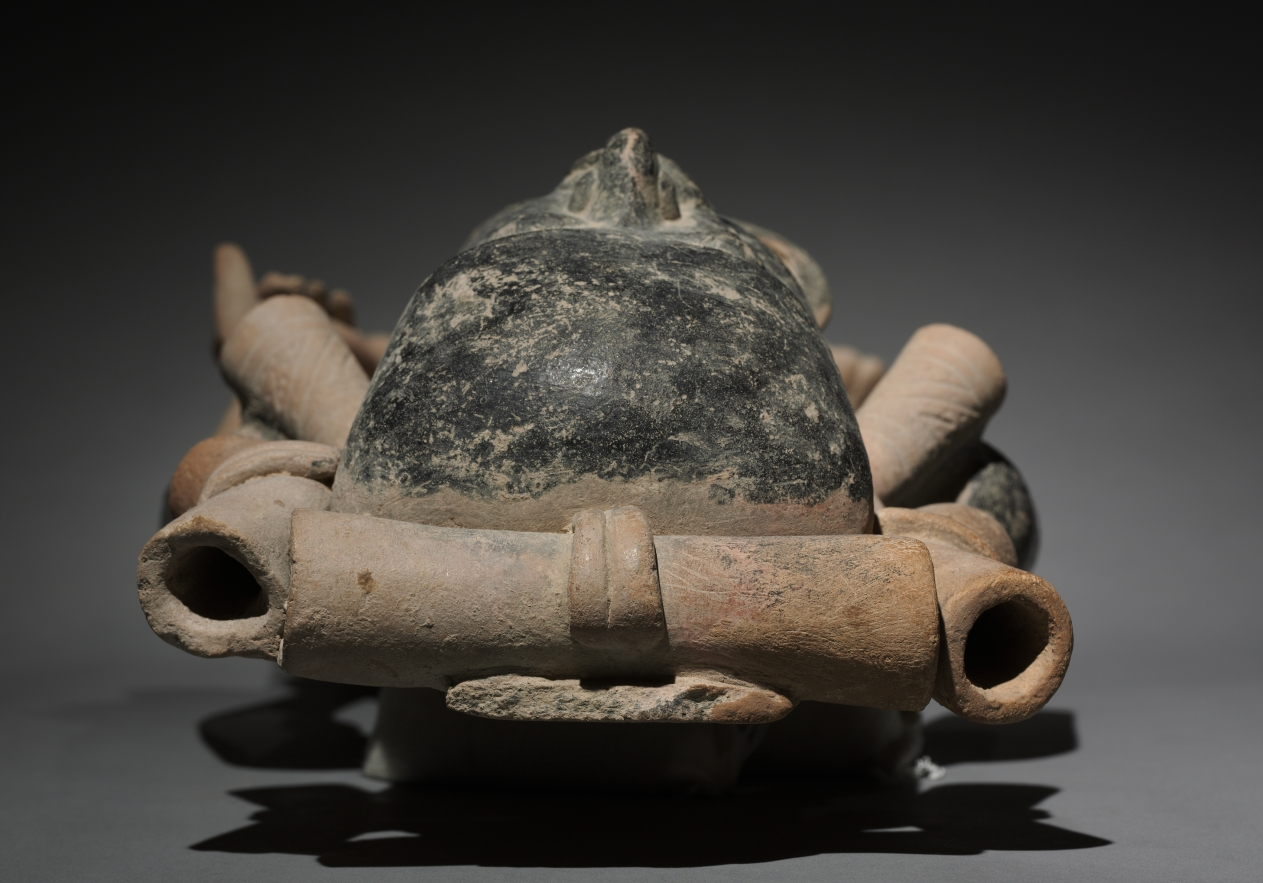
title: Standing Male Figure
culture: Mexico, Gulf Coast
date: 300–900 CE (thermoluminescence date, 240–945 CE)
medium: earthenware, asphalt and resin paint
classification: Sculpture